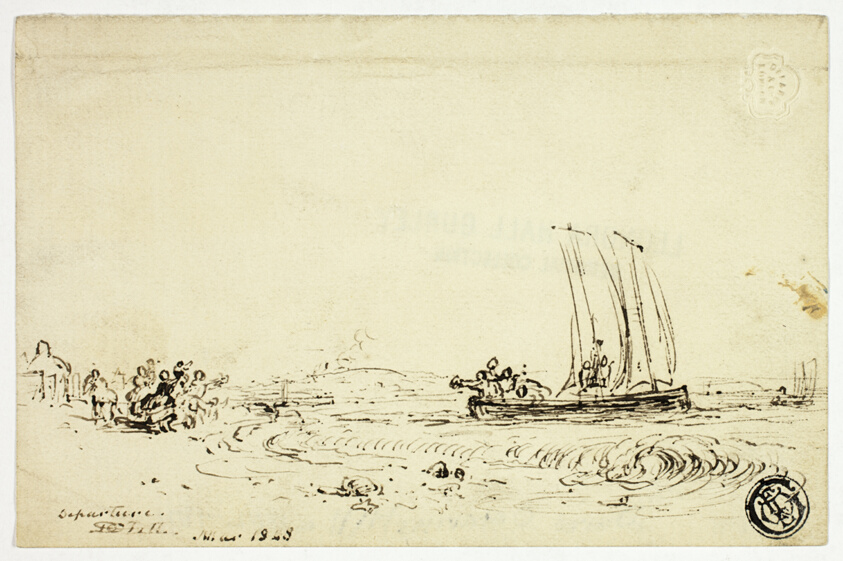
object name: Drawing and Watercolor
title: Departure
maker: David Octavius Hill (Scottish, 1802 - 1870)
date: 1848-1870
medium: Pen and brown ink on cream laid paper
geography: Scotland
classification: pen and ink drawings; drawings (visual works); prints and drawing